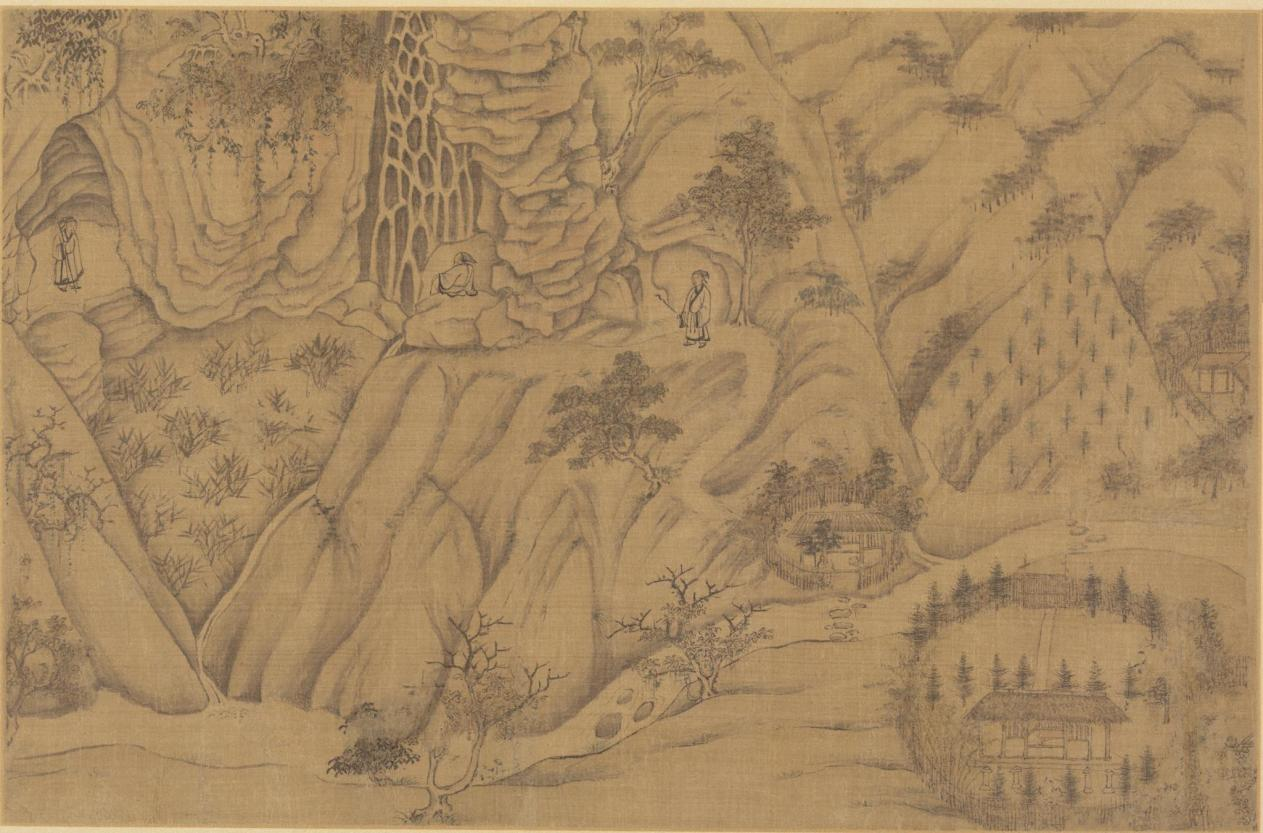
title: Dwelling in the Longmian ("Sleeping Dragon") Mountains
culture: China, Song dynasty (960-1279) - Yuan dynasty (1271-1368)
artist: follower of Li Gonglin (Chinese, c. 1049–1106)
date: 1100s-1200s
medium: handscroll mounted as an album leaf; ink and color on silk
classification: Painting